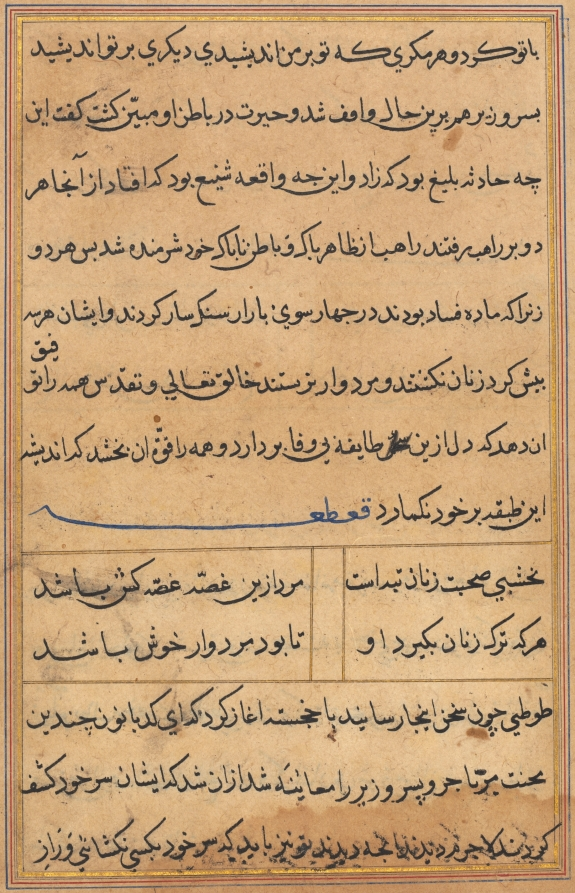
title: Page from Tales of a Parrot (Tuti-nama): text page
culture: Mughal India, court of Akbar (reigned 1556–1605)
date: c. 1560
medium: gum tempera, ink, and gold on paper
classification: Painting